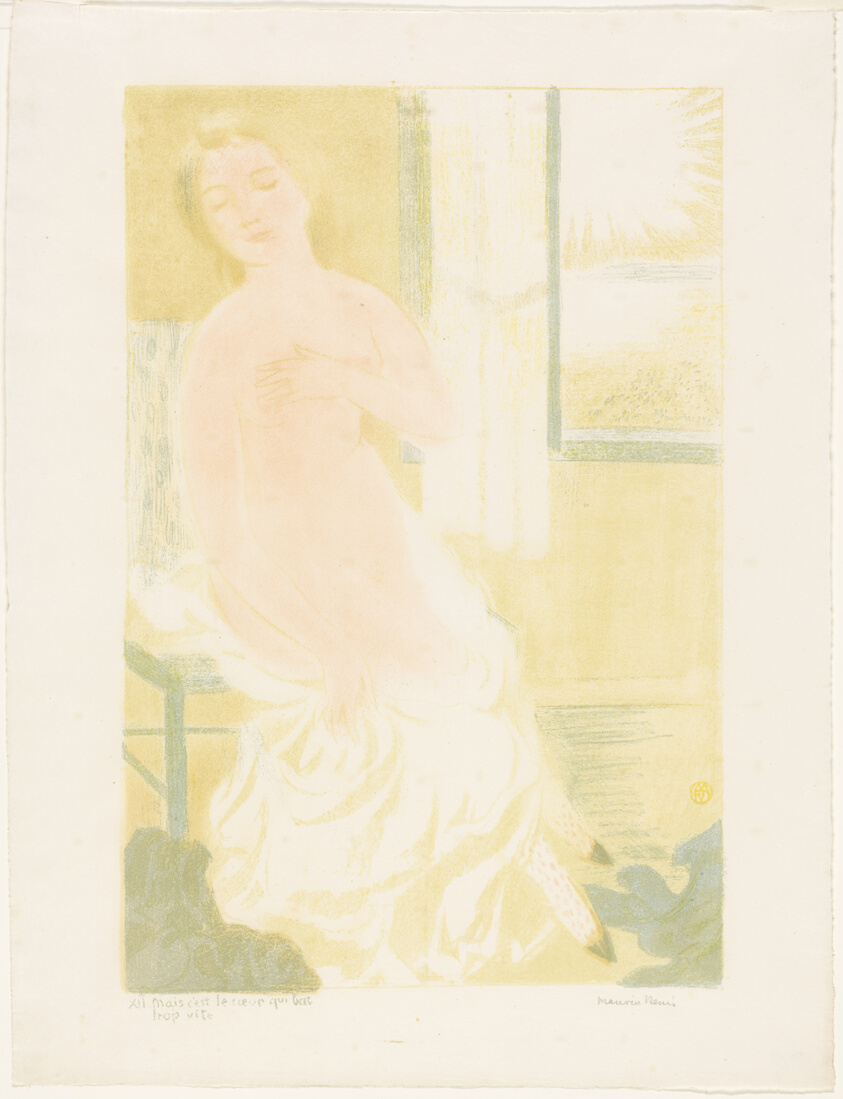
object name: Print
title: But It is the Heart That Beats Too Quickly, plate twelve from Love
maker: Maurice Denis (French, 1870-1943); published by Ambroise Vollard (French, 1867-1939)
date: 1898, published 1899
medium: Lithograph in yellow-green, pink, and blue on light ivory wove paper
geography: France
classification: lithograph; print; prints and drawing